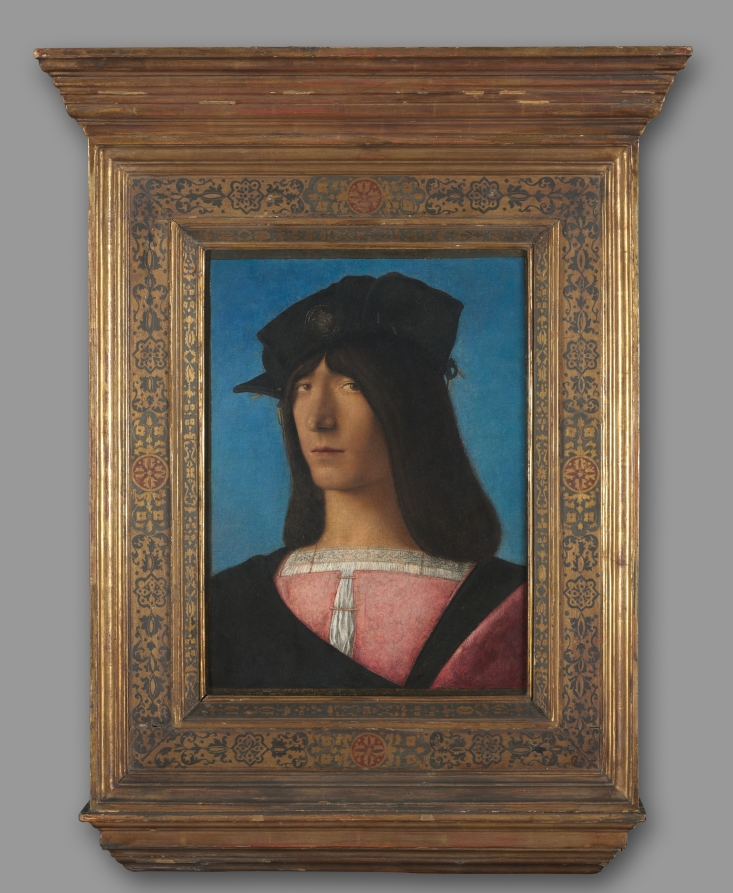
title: Portrait of a Man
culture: Italy, 16th century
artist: Bartolomeo Veneto (Italian, 1531)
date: c. 1510s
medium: oil on wood, transferred to wood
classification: Painting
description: This young man is possibly a member of the Sforza household, the ruling family of Milan during the Renaissance. He wears a plaquette on his hat indicating his nobility and status. This medallion depicts an actual work by Andrea Riccio (1470–1532), an artist whose work is represented in the museum's collection. The medallion illustrates an allegory of fortune and virtue personified by a winged woman and a child.